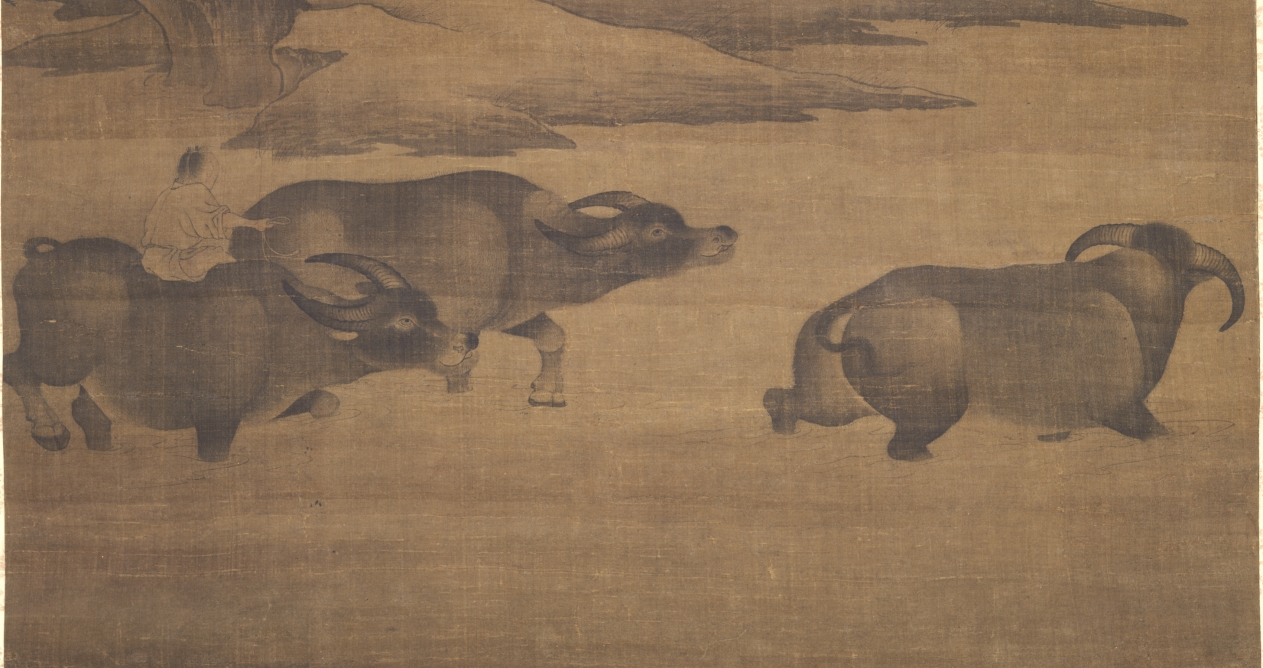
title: Herdboys and Buffalo in Landscape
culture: China, Qixian, Yuan dynasty (1271-1368)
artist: Guo Min (Chinese, mid-late 1200s)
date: 1200s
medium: Hanging scroll; ink on silk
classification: Painting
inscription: 齊向中流渡，那知行路難。/ 前村青草長，煙雨□漫漫。/ 伯達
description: Herdboys tend their buffalo in a bucolic landscape by a winding stream. Guo Min emphasizes the massive forms and mighty power of the animals, transforming them into forces of nature. The poem on this scroll reads: "Together, they wade through the middle of the stream, Mindless of perils in the journey. The grass grows tall in the village ahead, While the mist and rain spread far and wide."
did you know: Tending water buffalos has traditionally been the task of young boys and can still be seen in rural areas of Southern China today.